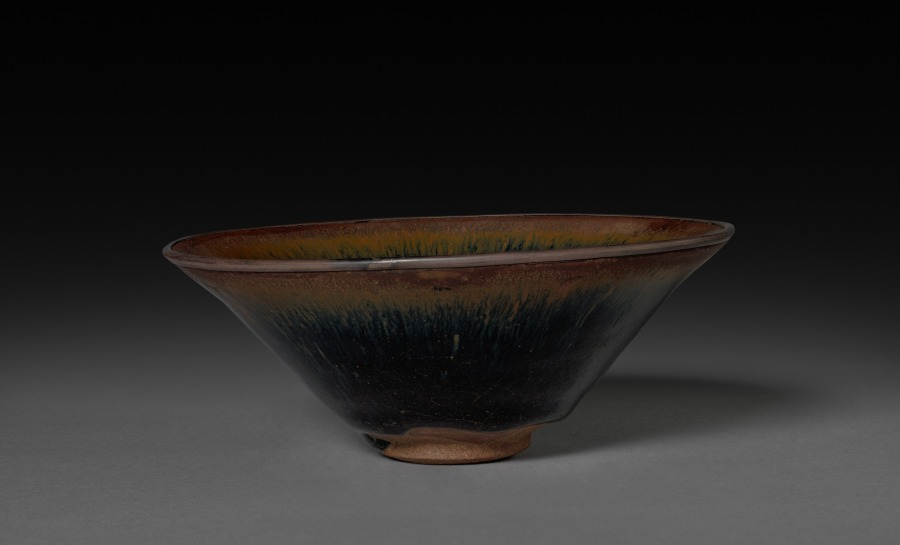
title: Tea Bowl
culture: China, Fujian province, Song dynasty (960-1279)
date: 960– 1279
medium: brown stoneware with iron slip glaze, Jian ware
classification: Ceramic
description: This tea bowl's coarse brown stoneware body was first covered with a thick, blue-black glaze. It was mottled with reddish-brown slip, whose pattern of streaks and spots are affectionately termed "hare's fur" among connoisseurs.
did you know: Jian ware was very popular with the tea cultures in China and Japan.